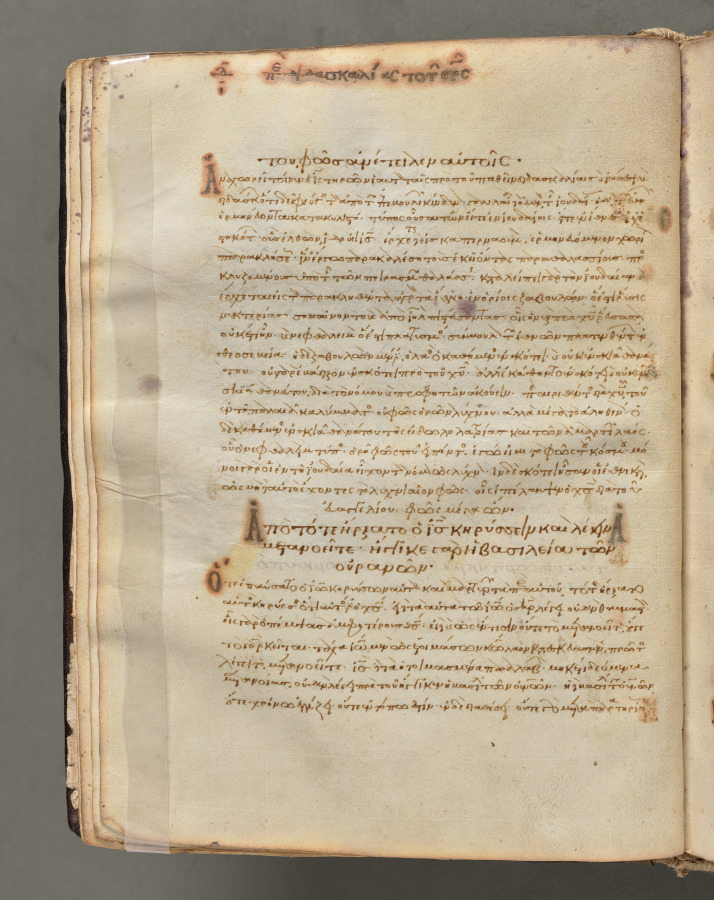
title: Text, folio 16 (verso), from a Gospel Book with Commentaries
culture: Byzantium, Constantinople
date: c. 1000–1100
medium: ink, tempera, and gold on vellum; leather binding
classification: Bound Volume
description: Each of the four gospels in this book opens on a page with brilliantly illuminated borders depicting the author of the text as well as birds-principally peacocks, symbols of the immortality of the soul-and fountains, representing the fountain of life and the salvation of the soul. This volume consists of 428 leaves with texts in Greek. Its level of sophistication suggests that it was probably written and decorated in a monastery in Constantinople.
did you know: Gospel Books were carried in procession through Byzantine churches.